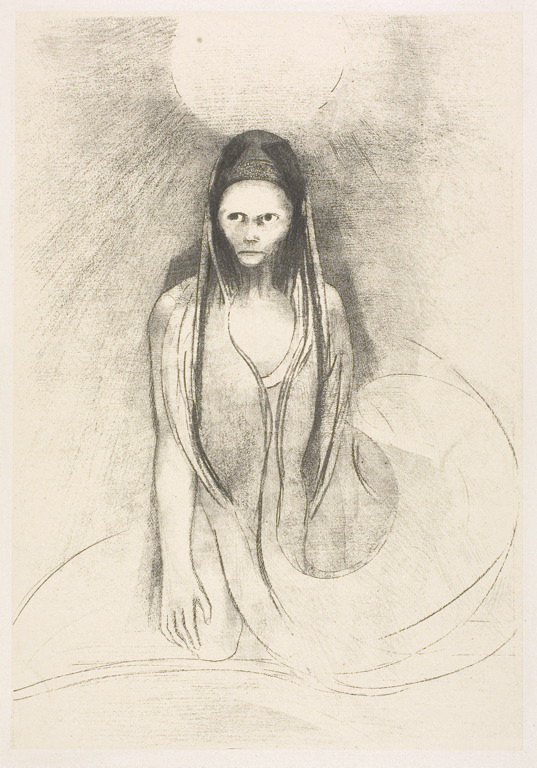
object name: Print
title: Intelligence was Mine! I Became the Buddha, plate 12 of 24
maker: Odilon Redon (French, 1840-1916)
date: 1896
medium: Lithograph in black on cream China paper laid down on ivory wove paper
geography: France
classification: lithograph; print; prints and drawing; paper